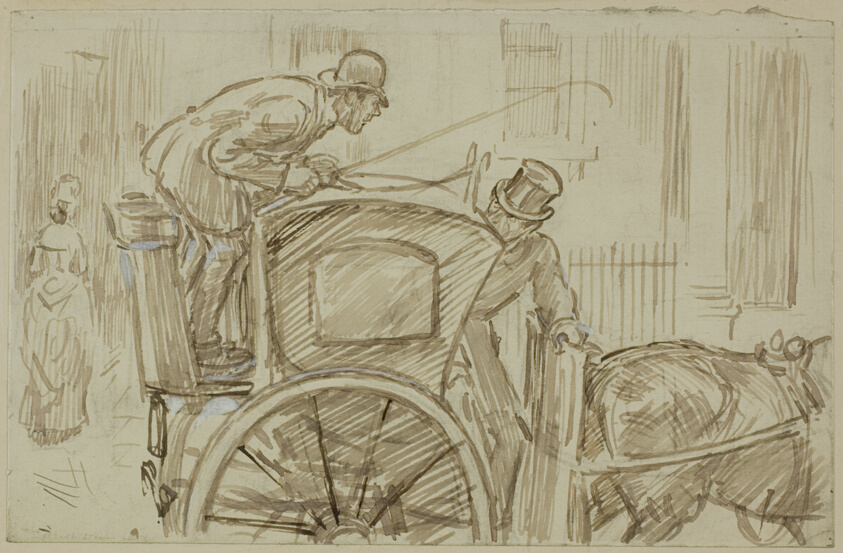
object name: Drawing and Watercolor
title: Thrift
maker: Charles Samuel Keene (British, 1823-1891)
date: 1870/91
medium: Pen and brown ink, with touches of white gouache, over black chalk, on cream wove paper, laid down on buff wove card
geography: England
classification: pen and ink drawings; drawings (visual works); prints and drawing